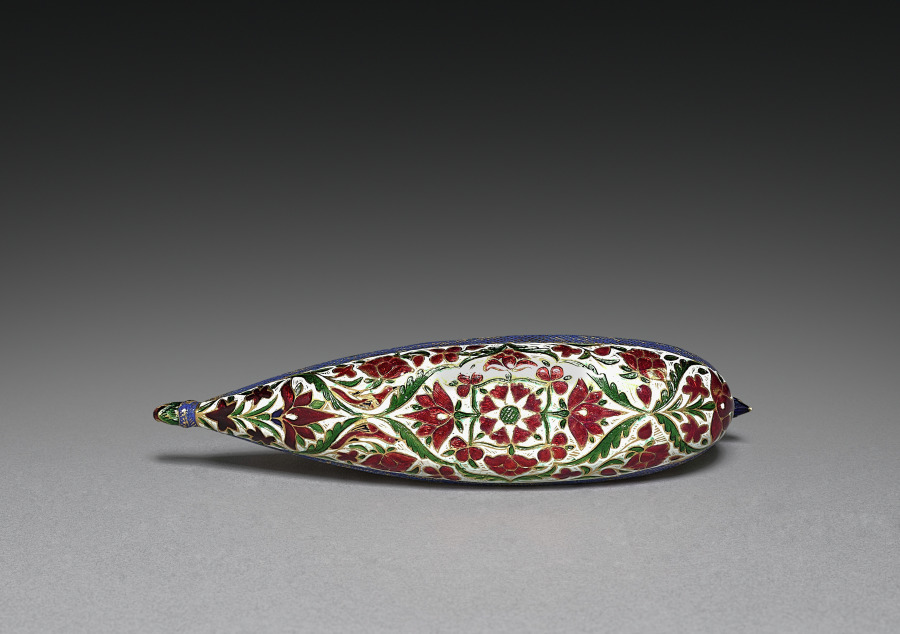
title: Inkstand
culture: Northwestern India, Rajasthan, Jaipur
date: 1800s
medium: Gold, silver, and enamel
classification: Jewelry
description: This enamel inkstand takes the fanciful form of a pleasure boat, linking the composing of poetry and the writing of calligraphy to the amusement of the senses. The luxurious materials and elegant form also indicate that scribal activities require a certain level of refinement. Cleverly, the enamelist placed a lotus design on the bottom of the vessel; as a flower that floats on water, the bloom represents both the water imaginatively splashing against the underside of the boat and the actual ink swishing inside the bilge. This inkstand was purchased by Cleveland Museum of Art founder Jeptha Homer Wade II (1857–1926) and his wife Ellen Garretson Wade (1857–1917) as they made a tour of India on their own pleasure boat, the Wadena.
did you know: The silver core of this inkwell has been covered in gold leaf.